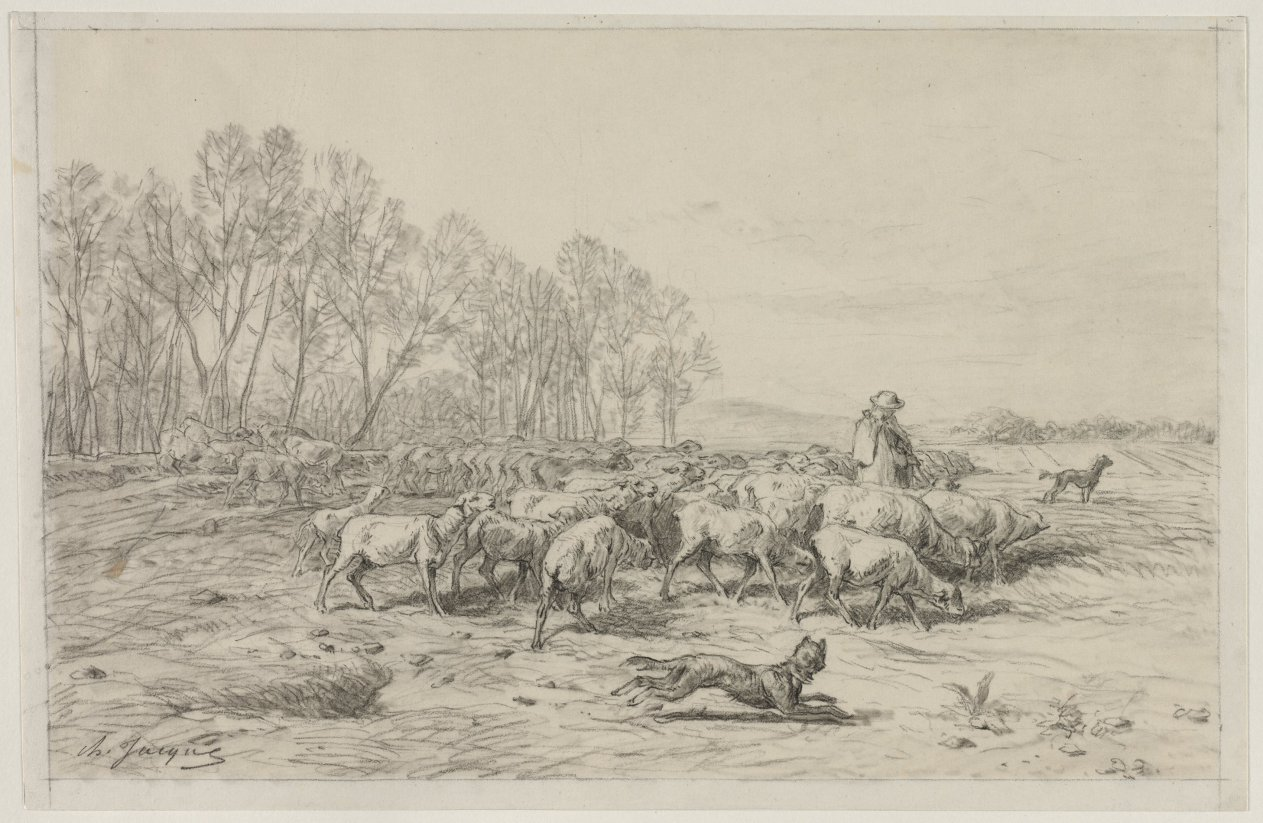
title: Landscape with a Flock of Sheep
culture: France, 19th century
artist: Charles-Émile Jacque (French, 1813–1894)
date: 1800s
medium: black chalk with stumping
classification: Drawing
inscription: signed, lower left, in black chalk: ch. Jacque